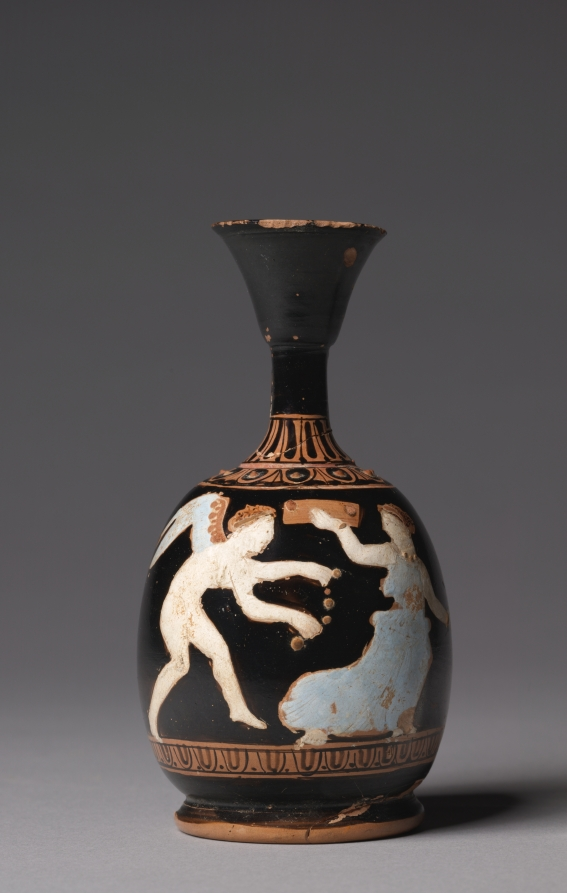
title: Red-Figure Squat Lekythos (Oil Vessel): Eros and Woman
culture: Greek, Attic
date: c. 400–380 BCE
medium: ceramic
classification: Ceramic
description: This miniature oil vessel dates to the early fourth century BC, a time when red-figure vase painters become more liberal in the use of added white and other colors. Here, both Eros and the woman he pursues have white skin, with blue adorning her garment and his wings, and light brown coloring the added clay used for their jewelry, headbands, and the fronts of his wings. A large red-figure palmette, flanked by tendrils and half-palmettes, occupies the back of the vase.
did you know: Added clay pellets help to define the figures’ jewelry and other elements, including the ornament above.